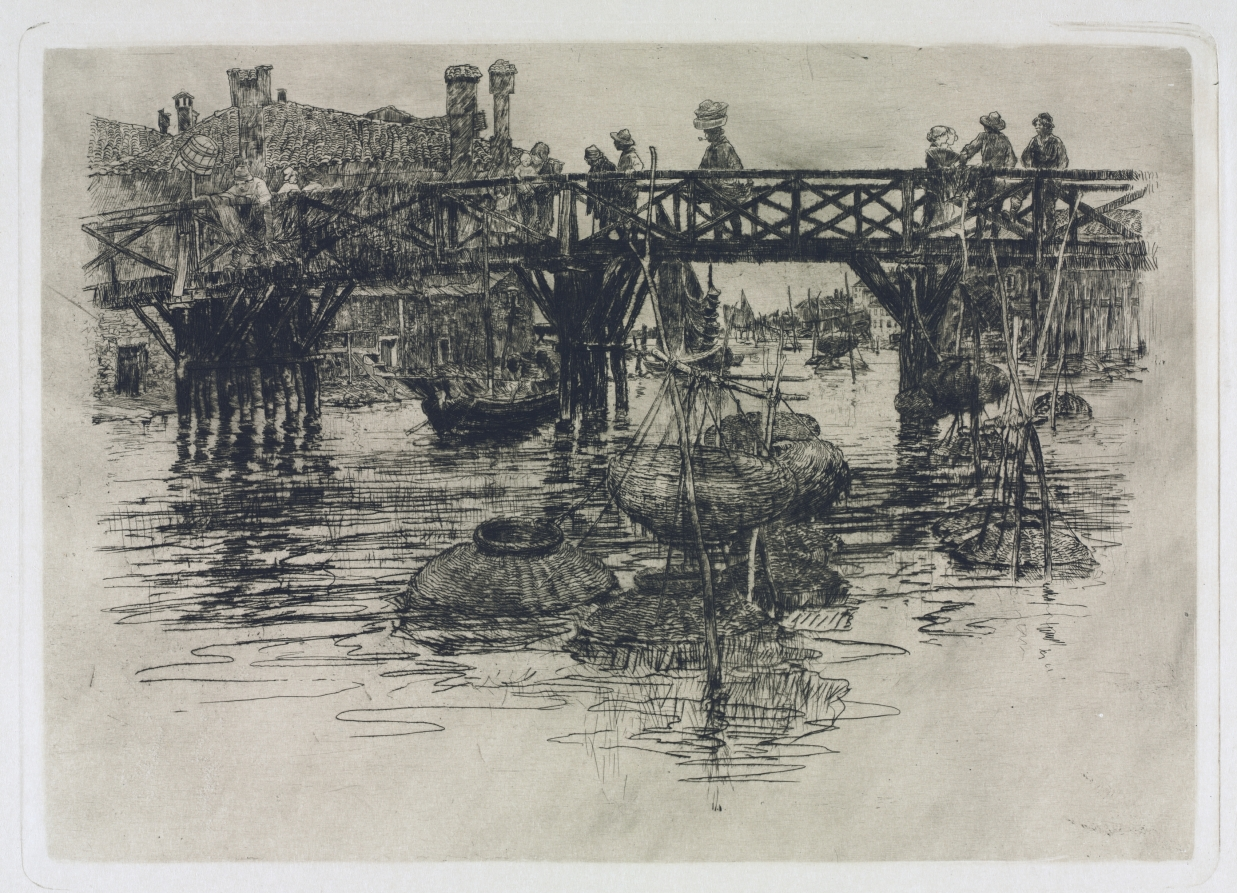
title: San Pietro in Castello, Venice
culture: America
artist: Frank Duveneck (American, 1848–1919)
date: 1883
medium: etching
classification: Print